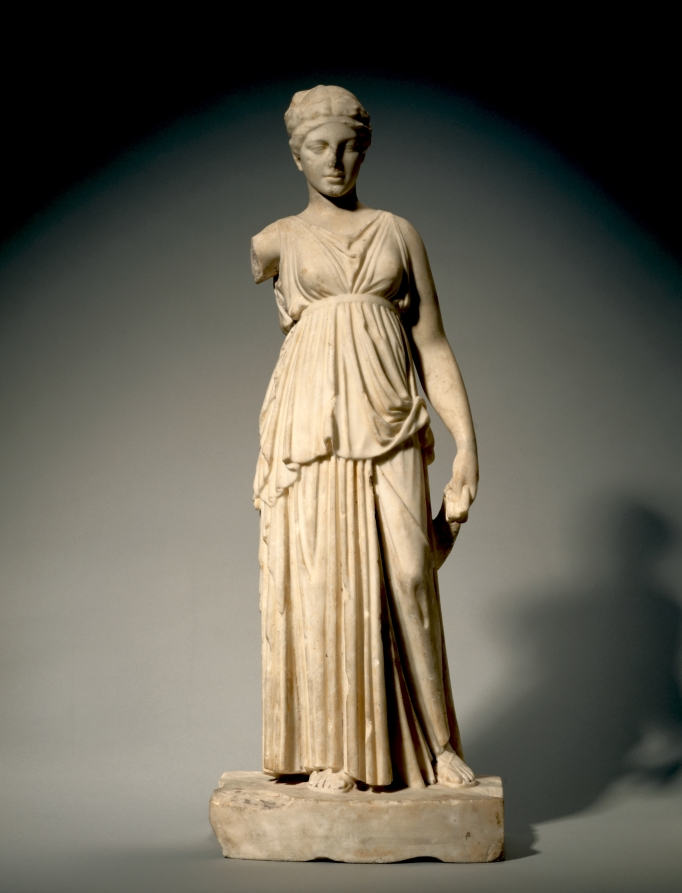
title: Dancer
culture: Greece, Alexandria(?)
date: c. 50 BCE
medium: marble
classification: Sculpture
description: The pose and dress of this statuette of a woman, together with her elaborate sandals and hairstyle, suggest that she represents a dancer. Standing with one knee slightly bent, she holds a sash in her lowered left hand. The sash passes behind her back, probably to be held aloft in her right hand, now separated. She wears a chiton, a rectangular sheet folded at the top to create a large overhang, then wrapped around the left side of the body and pinned at the shoulders. Belted high above her waist, the fabric cascades in deep folds.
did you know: Three nonjoining fragments, including a right hand and arm, may belong to this statuette.